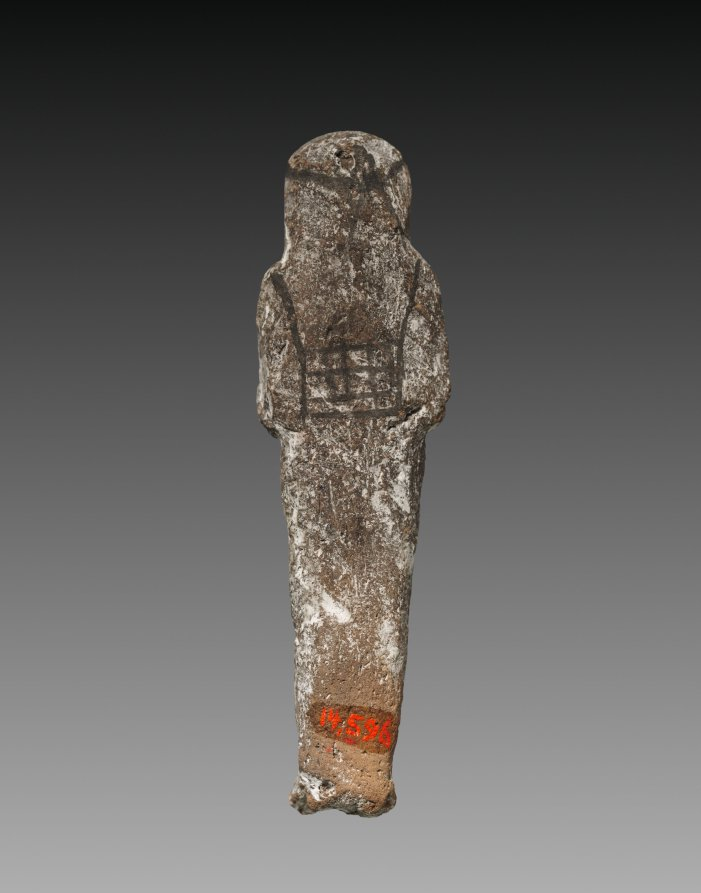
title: Shawabty of Tabaketenkhonsu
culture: Egypt, Third Intermediate (1069–715 BCE), Dynasty 21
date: 1000–956 BCE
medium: painted terracotta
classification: Funerary Equipment